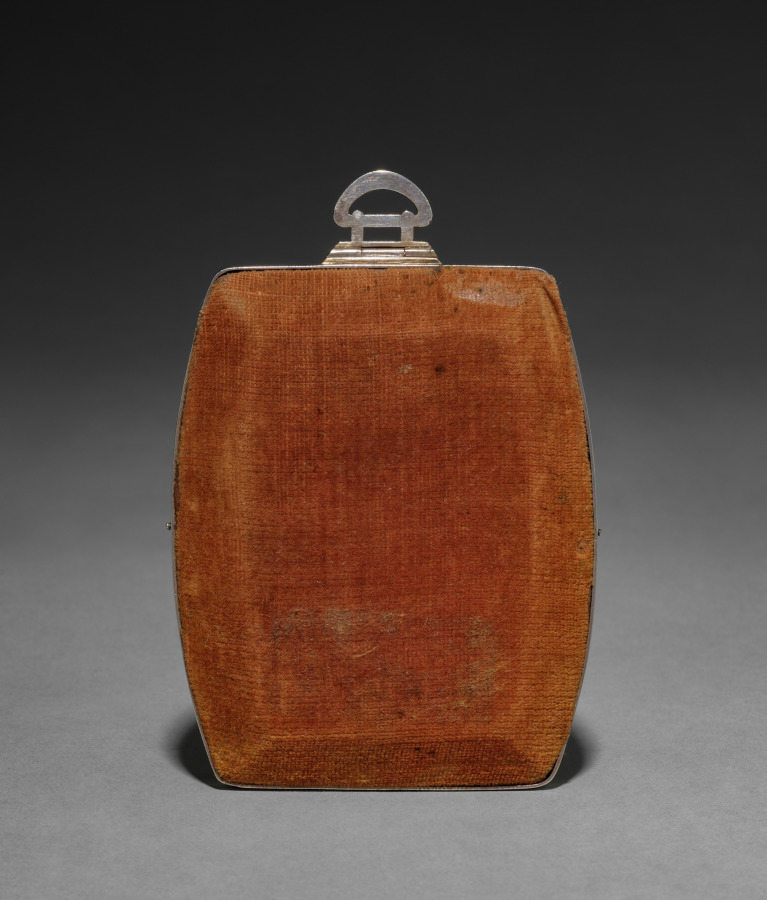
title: Pendant Icon of Our Lady of Kazan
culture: Russia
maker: House of Fabergé (Russian, 1842–1918)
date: 1915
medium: silver, enamel, glass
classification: Silver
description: One of the most revered icons in the Russian Orthodox church, Our Lady of Kazan represents the Virgin Mary as the patroness of the city of Kazan and the Holy Protectress of Russia. Fabergé embellished this icon with cloisonné (partitioned) enamel in a striking palette, as well as beaded ornaments and spiral motifs in the pan-Slavic/Neo-Russian style.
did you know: Similar to the Arts and Crafts movements, the pan-Slavic/Neo-Russian style turned to earlier handicraft traditions for inspiration.